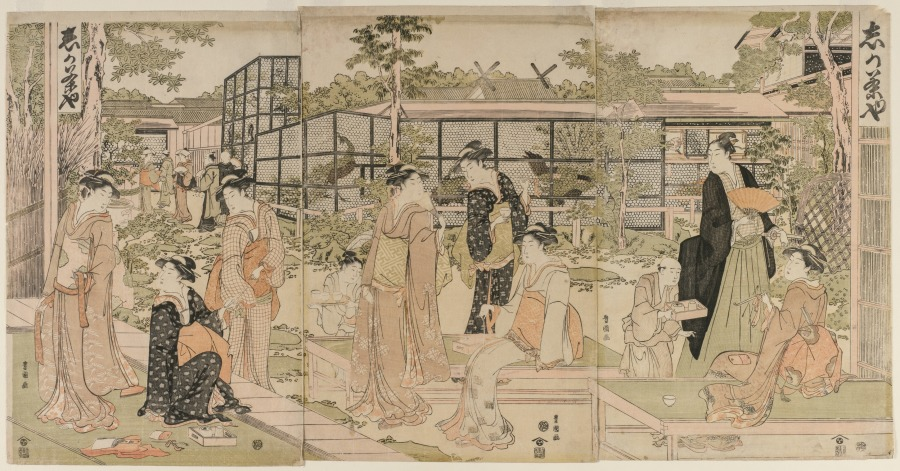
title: The Shika Teahouse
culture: Japan, Edo period (1615–1868)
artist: Utagawa Toyokuni (Japanese, 1769–1825)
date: early 1790s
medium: Triptych of color woodblock prints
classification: Print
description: Exotic birds and tobacco—Western imports—feature in this composition. Peacocks and parrots were brought to Japan by Dutch traders in the 1700s. Many of the visitors to this teahouse, which specialized in displays of foreign birds, admire the unusual fowl while sipping tea and smoking long pipes. The birds have attracted curious courtesans, entertainers, samurai, merchants and their wives, and even a Buddhist monk.